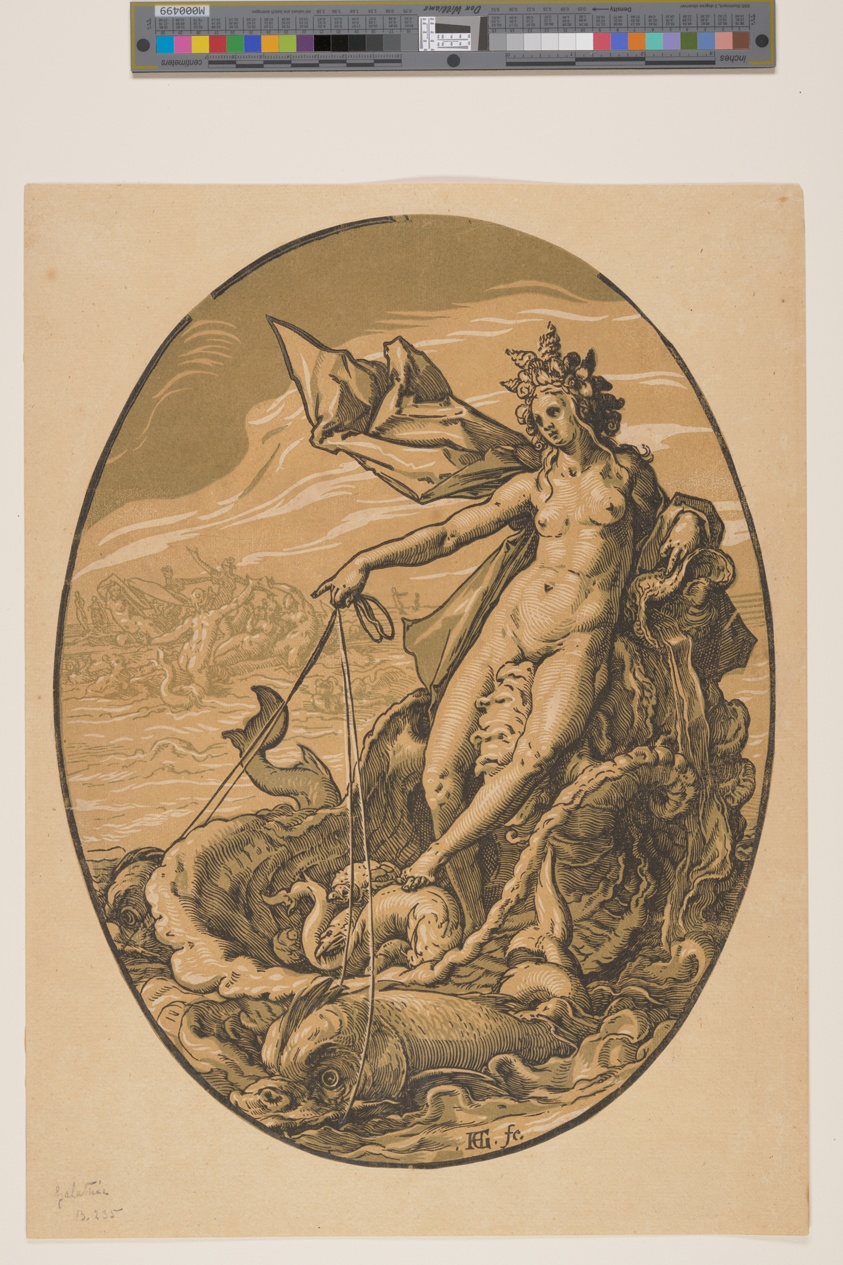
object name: Print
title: Tethys, from The Deities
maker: Hendrick Goltzius (Dutch, 1558–1617)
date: 1588/90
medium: Chiaroscuro woodcut from three blocks in tan and green on ivory laid paper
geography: Netherlands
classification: print; paper; prints and drawing; woodcut